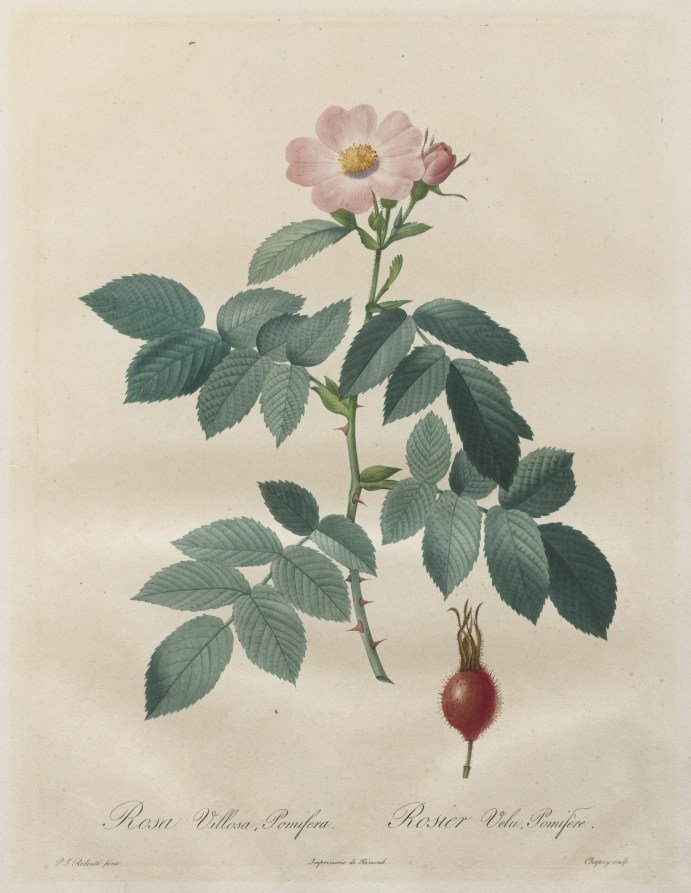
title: Les Roses: Rosa villosa, pomifera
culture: France, 19th century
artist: Henri Joseph Redouté (French, 1766–1853)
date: 1817–1824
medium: stipple and line engraving, with hand coloring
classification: Print